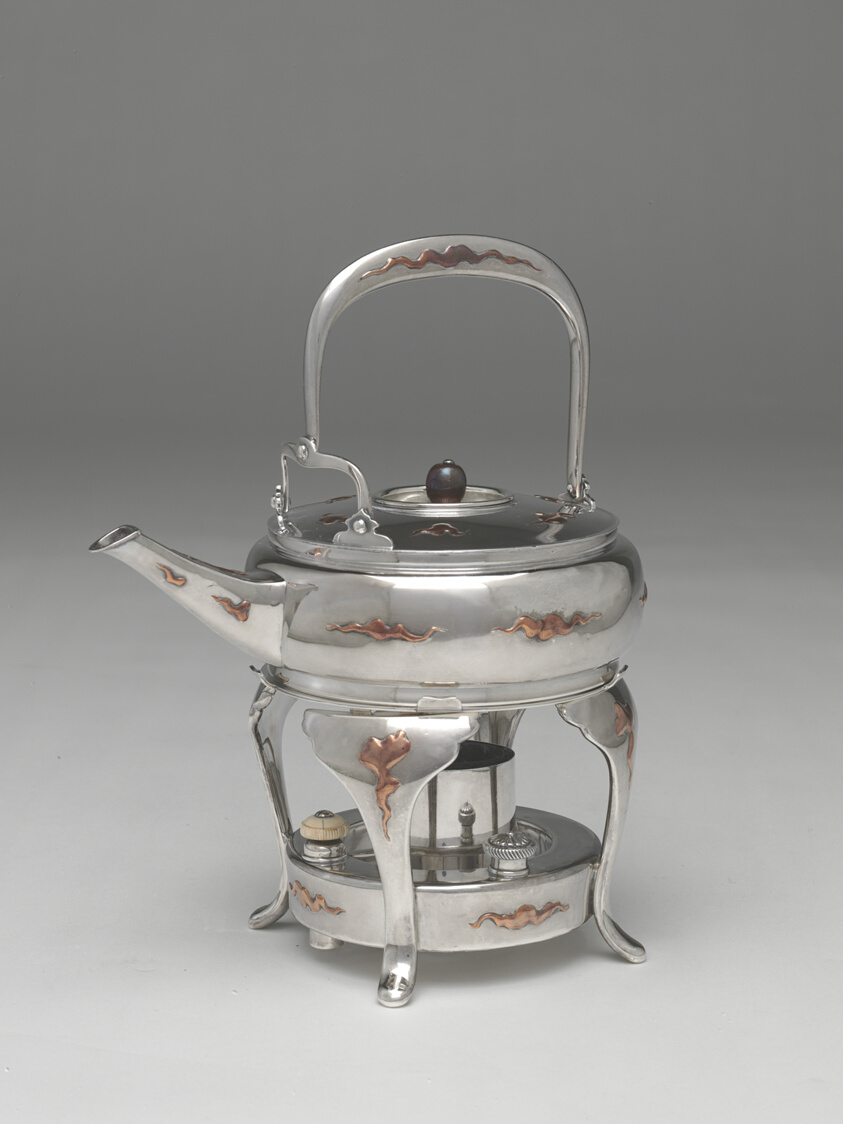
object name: Metalwork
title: Teakettle and Stand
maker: Design attributed to Edward C. Moore (American, 1827–1891); Tiffany and Company (American, founded 1837); New York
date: tea kettle: 1877; stand: 1889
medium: Silver with copper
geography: New York City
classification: kettle (vessel); teaware; silver; american decorative arts; american arts; decorative arts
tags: dining, drinking